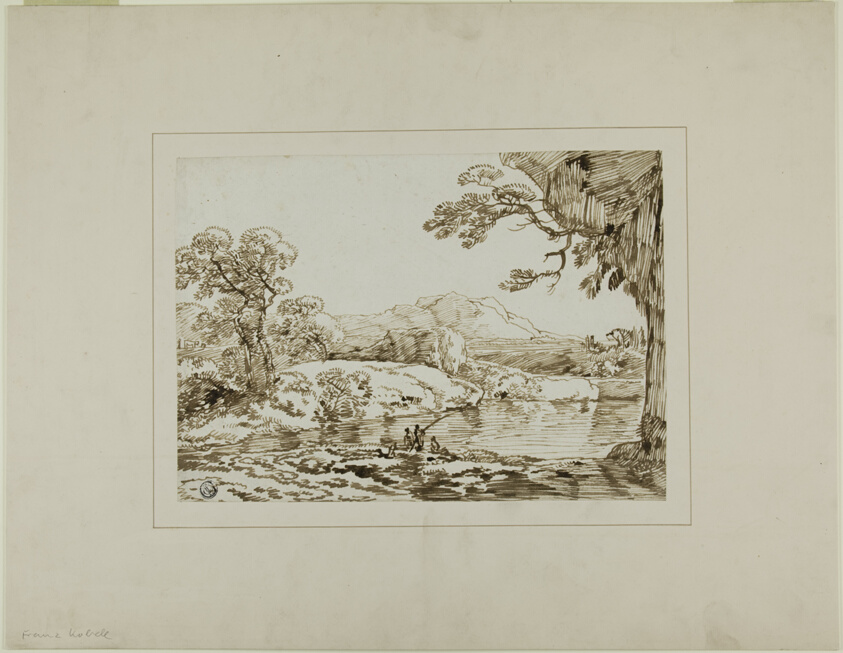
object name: Drawing and Watercolor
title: Landscape with River, Distant Hills, and Figures Fishing in Foreground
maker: Franz Kobell (German, 1749-1822)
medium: Pen and brown ink on ivory laid paper, mounted to buff card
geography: Germany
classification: pen and ink drawings; drawings (visual works); prints and drawing